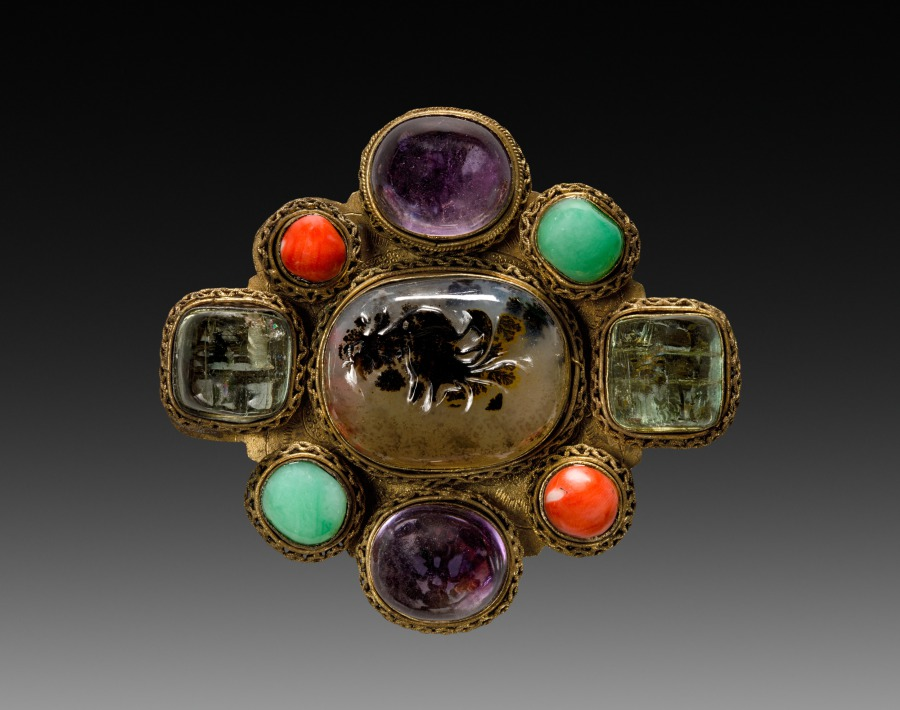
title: Buckle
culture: China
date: 1900s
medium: jade, amethyst, coral, crystal and agate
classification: Jewelry